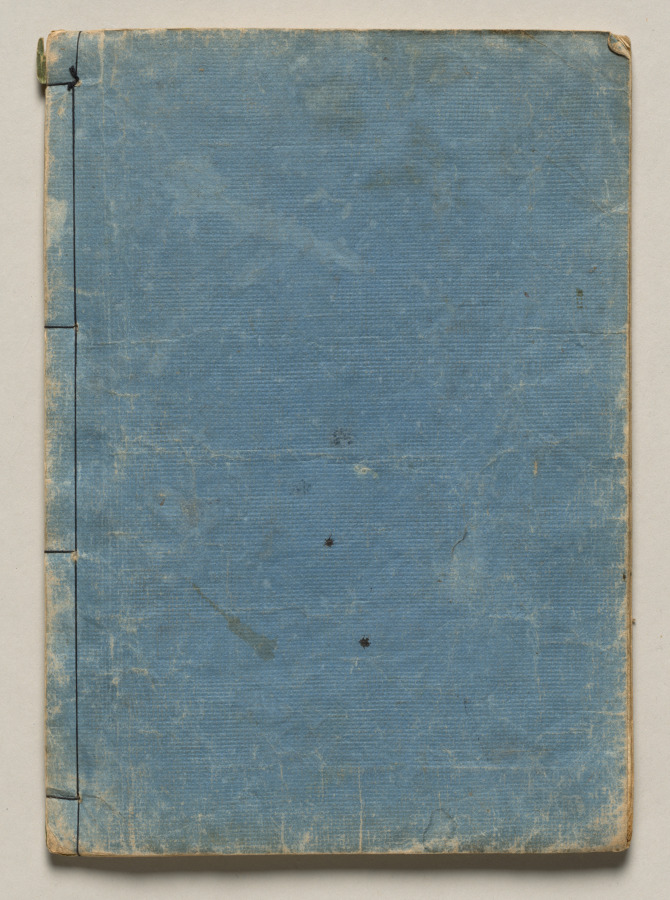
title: Volume Seven of People of Japan in Light Verse (Kyōka)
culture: Japan, Edo period (1615–1868)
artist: Utagawa Hiroshige (Japanese, 1797–1858)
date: 1857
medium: Woodblock-printed book; ink and color on paper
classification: Bound Volume